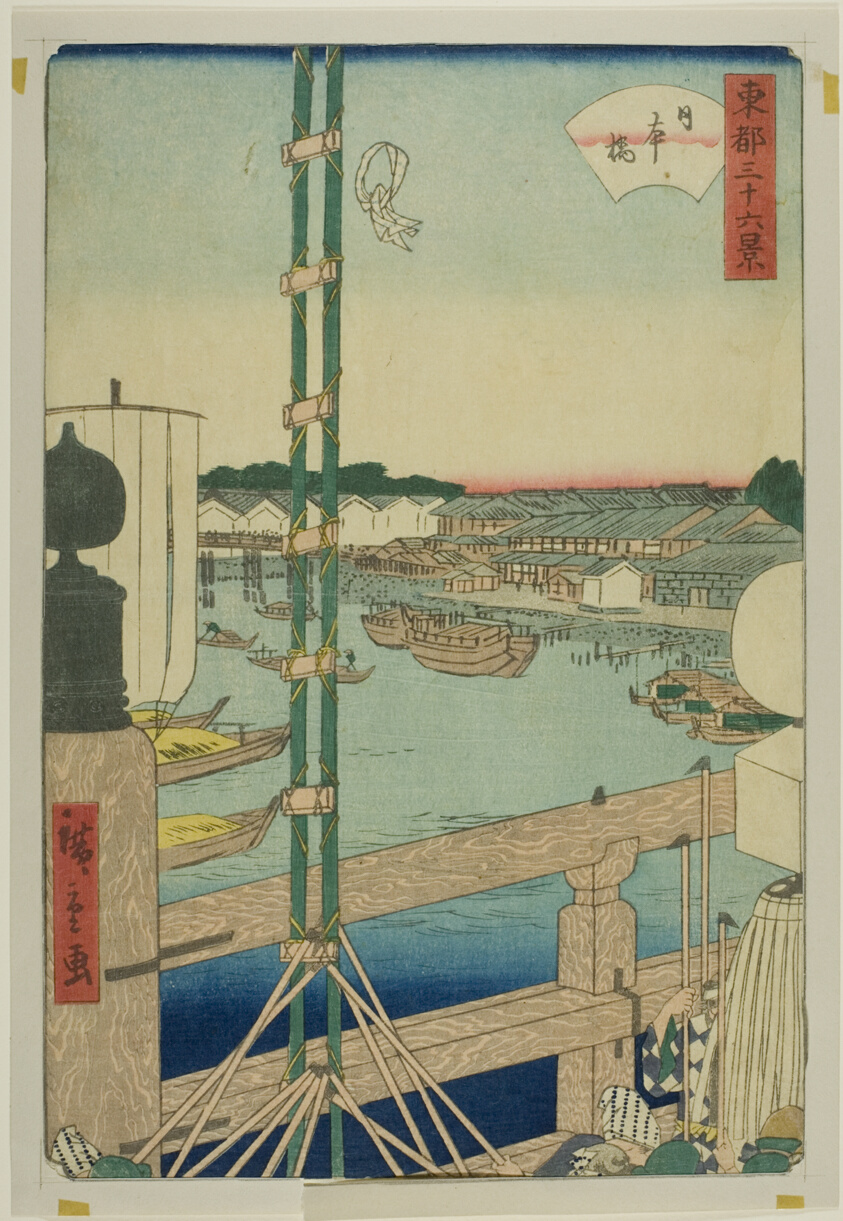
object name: Print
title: Nihonbashi from the series Thirty-six Views of the Eastern Capital (Toto sanjurokkei)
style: Japanese (culture or style)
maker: Utagawa Hiroshige II (Shigenobu) (Japanese, 1826–1869)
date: c. 1853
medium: Color woodblock print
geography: Japan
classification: woodblock print; print